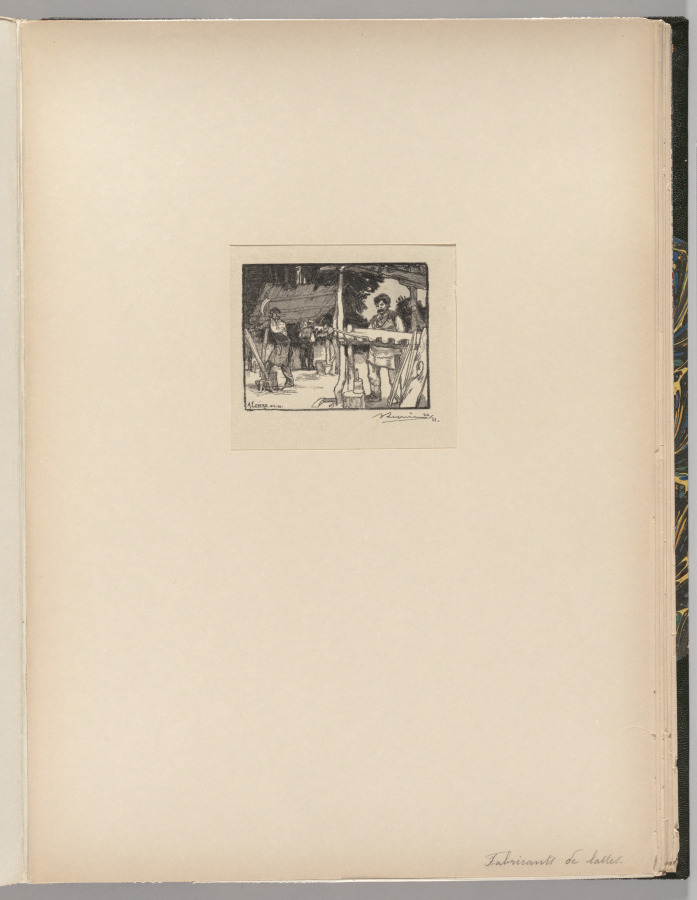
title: Fontainebleau Forest: Manufacturer of Slats (La Forêt de Fontainebleau: Le Fabricant de lattes)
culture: France, 19th century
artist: Auguste Louis Lepère (French, 1849–1918)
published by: A. Desmoulins, Published in Revue Illustrée, 1887–90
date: 1890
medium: wood engraving from bound volume of 34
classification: Bound Volume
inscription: In block, lower left: A. LEPÈRE. Del. sc; below image, lower right, in black ink: ALepère 22/35; on window mat, lower right, in graphite Fabricants de lattes